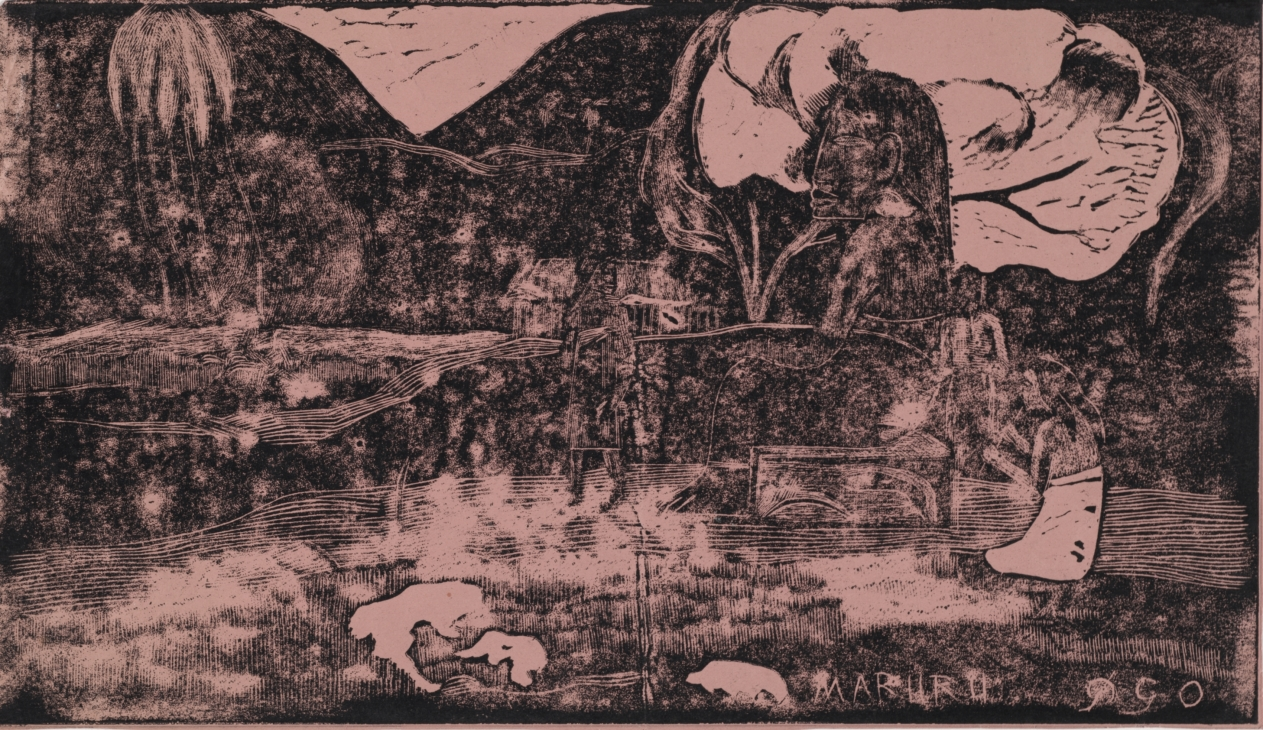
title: Maruru (Offerings of Gratitude)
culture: France, 19th century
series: Noa Noa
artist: Paul Gauguin (French, 1848–1903)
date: 1893–94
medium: woodcut on pink paper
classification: Print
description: In 1891 Paul Gauguin traveled to Tahiti, seeking a more authentic style of art making than the conservatism he rejected in Western culture. After returning to Paris in 1893, he began working on Noa Noa, an illustrated book that explained and illustrated his experiences abroad. Although the project was never completed, this print is one of its illustrations. Gauguin depicted a lush landscape by chiseling roughly into a woodblock, a technique meant to suggest relief sculpture he viewed in Tahiti. This style is emphasized by the irregularly applied ink of Maruru—one of only a few impressions Gauguin printed himself.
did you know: The majority of prints from Noa Noa were printed by the master printer Louis Roy or, later, by Paul Gauguin's son Pola, making this impression particularly rare.